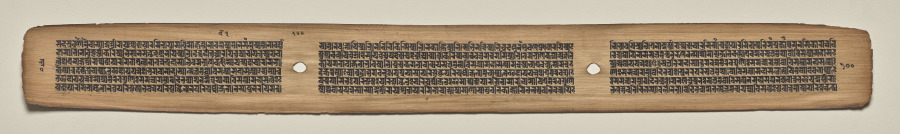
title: Text, Folio 100 (verso), from a Manuscript of the Perfection of Wisdom in Eight Thousand Lines (Ashtasahasrika Prajnaparamita-sutra)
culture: Eastern India, Bihar, Vikramashila Monastery. Painting: Nepal, Kathmandu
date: Sunday, September 14, 1119 (year 239 of the Newar Samvat in the month of Ashvina)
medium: gum tempera and ink on palm leaves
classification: Painting